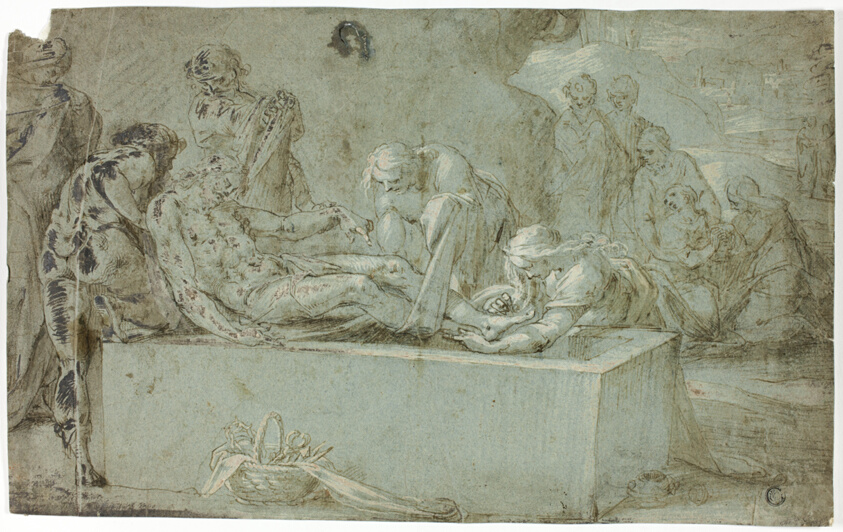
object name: Drawing and Watercolor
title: Entombment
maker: Attributed to Bartholomaeus Spranger; Flemish, 1546-1611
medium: Pen and brown ink with brush and brown wash, heightened with lead white (discolored), over black chalk, on blue laid paper, laid down on ivory laid paper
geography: Flanders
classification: pen and ink drawings; drawings (visual works); prints and drawing